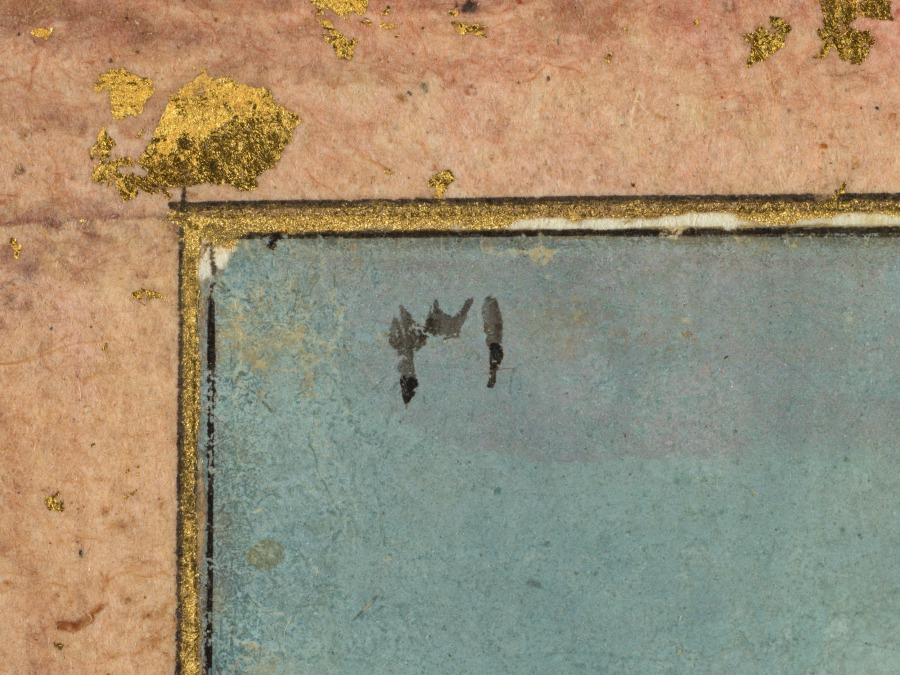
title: Shri Raga: An Illustration from a Ragamala Series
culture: India, Mughal, 18th century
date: c. 1740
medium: Gum tempera and gold on paper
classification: Painting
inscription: Inscription at top, Persian numerals: 31; Persian inscriptions on verso, in nasta‘liq script: 31 Sixth, Shri Raga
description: The verse associated with Shri Raga corresponds closely with this scene: His body, bluish in hue, is marvelously built. He is always graced with the company of auspicious Shri Lakshmi. He sits on a throne of gold, and before him Narada sits playing on his vina. He has decorated himself with garlands of flowers, and also with ornaments set with jewels. Shri raga is thus conceived in sentiment, of whom all learned men sing praises. The horse-headed figure claps his hands and accompanies the sage, wearing saffron garments and playing on the stringed instrument called a vina. He may be derived from the courtly commander of Indra, seen in the Jain manuscripts. Poppies bloom in the formal garden below the pure white terrace, and they are echoed by the oranges set on the windows of the house at the upper right.